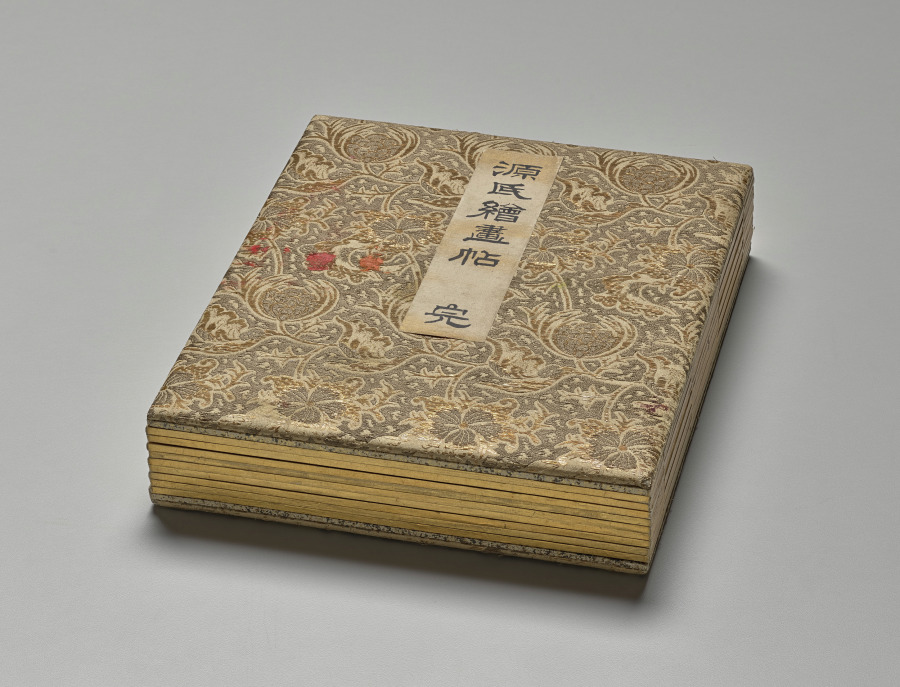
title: Album of Illustrations for the Tale of Genji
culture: Japan, Edo period (1615–1868)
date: 1600s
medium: Double-sided accordion-style album of 17 leaves; ink, light color, and gold on paper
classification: Bound Volume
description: This album contains illustrations for the classic literary work the Tale of Genji, authored in the 1000s by Murasaki Shikibu, an aristocrat of the Heian period (794–1185) court. The scenes are painted in the “white drawing” (hakubyō) mode, in which a fine ink line is used to depict figures and spaces with great subtlety, punctuated only occasionally by traces of red pigment for a character’s lips, a detail of a garment, or a decorative element. These two scenes illustrate episodes from the chapters “Thin Veil of Cloud” (Usugumo) and “Barrier Gate” (Sekiya).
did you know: The illustrations are identified by chapter title in cartouches to the upper right of the paintings.